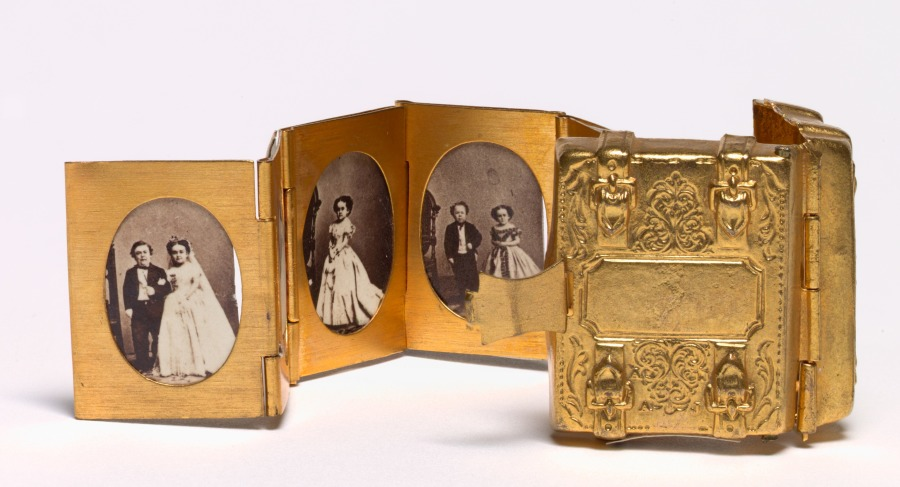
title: Somebody's Luggage (Miniature Wedding Album of Tom Thumb and Lavinia Warren)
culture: America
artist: Mathew Brady (American, 1823–1896)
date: c. 1863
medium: brass photographic locket with 12 miniature albumen prints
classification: Jewelry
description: This deluxe commercial souvenir commemorates the marriage of “General” Tom Thumb (Charles Sherwood Stratton) and Lavinia Warren, performers at P. T. Barnum’s American Museum. Thumb was such a celebrity that the wedding pushed the Civil War off newspapers’ front pages for days. Cartes-de-visite of the wedding sold in the thousands; Brady even licensed the image to lithographers and other photographers. In one image, Lavinia holds a baby who was borrowed for the photo shoot to suggest her domestic skills. The locket is shaped like a miniature suitcase bearing the words “Somebody’s Luggage,” the title of an 1862 story by Charles Dickens.